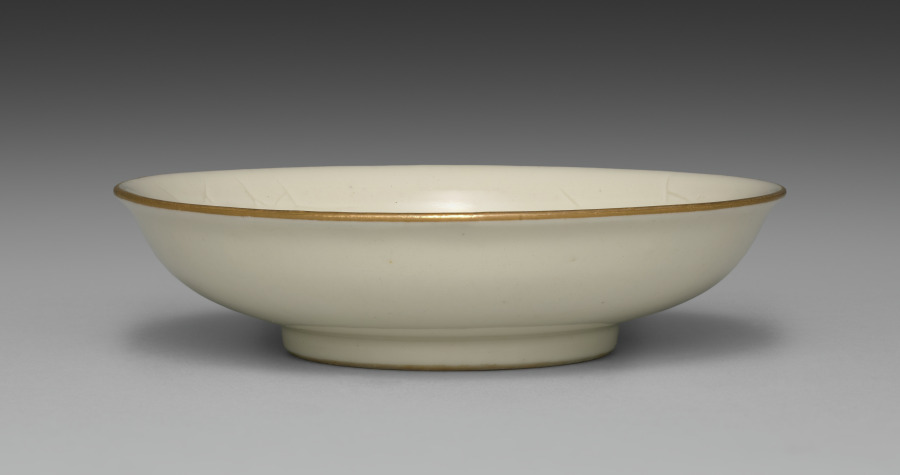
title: Small Dish from Dining Set with Plum Blossoms and Cracked-Ice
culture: Japan, Meiji period (1868–1912)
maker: Seifū Yohei II (Japanese, 1844–1878)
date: c. 1875–78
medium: Porcelain with molded designs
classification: Ceramic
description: Each item in this set has a delicate low-relief design of flowering plum branches over scattered, intersecting lines meant to resemble the cracked-ice surface of a frozen body of water and is signed on the base in gold pigment. While Yohei II produced many fine works in underglaze blue, like those produced by Kiyomizu Shichibei, he also made works in quite different styles later in his career, from the early 1870 s. In 1873, he was appointed purveyor to the Industrial Center of Kyoto Prefecture, a designation associated with Kyoto’s efforts to reach an international market through the port of Kobe; and from 1875 until his death, he was involved in national-level projects to present Japanese ceramics across the world. It was during this period that Yohei III was apprenticed to Yohei II, and it has been suggested that this set may in fact be an early example of Yohei III’s work, which he signed with his teacher’s name. Decorated with flowers resembling Japanese textile motifs, the set calls to mind the design of Yohei II’s pair of vases with plum blossoms in the Victoria and Albert Museum. Here, the elaborate trees created for a formal public exhibition setting have been translated into the approachable blossoms of the genteel domestic environment. While the designs are consistent across the pieces, each raised flower petal and pistil and each incised line in the ice was done by hand, so the cups, bowls, and dishes are similar yet unique. The bottoms of two boxes once identified the set’s owner, but the information has been deliberately obscured with black ink. However, inscriptions still visible appear to indicate two occasions, once at the end of July 1886 , and once again in June 1916 , when parts of the set were requested from Hokura in Niigata Prefecture. The location corresponds to a neighborhood in the present-day city of Jōetsu. The surname Tsuji 辻 also appears on a paper tag affixed to one of the box cloths. Future research may possibly reveal more about their provenance. A vase by Yohei III in a private collection combines the formal grandeur of the Yohei II vases in the Victoria and Albert Museum with the gentler design of this dining set, placing flowering plum trees against soft, scalloped-edge clouds resembling those in golden screens.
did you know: The dining wares have a creamy white coloration that the four boxes containing them identify as Korean in style.